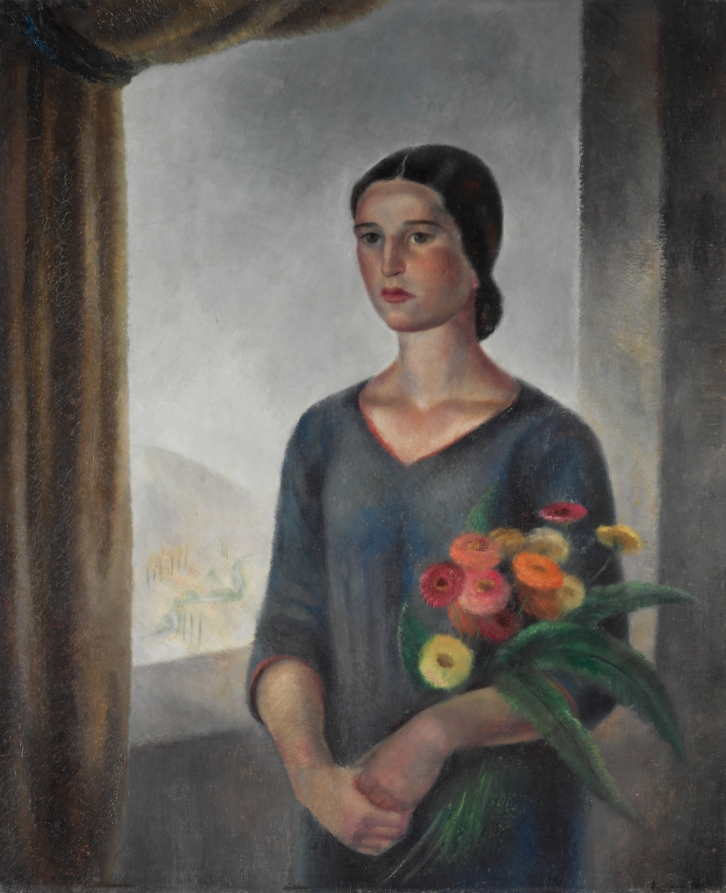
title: Francesca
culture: America, Ohio, Cleveland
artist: Louise B. Maloney (American, 1887–1973)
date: 1927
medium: oil on canvas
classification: Painting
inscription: signed lower right: Louise B. Maloney.